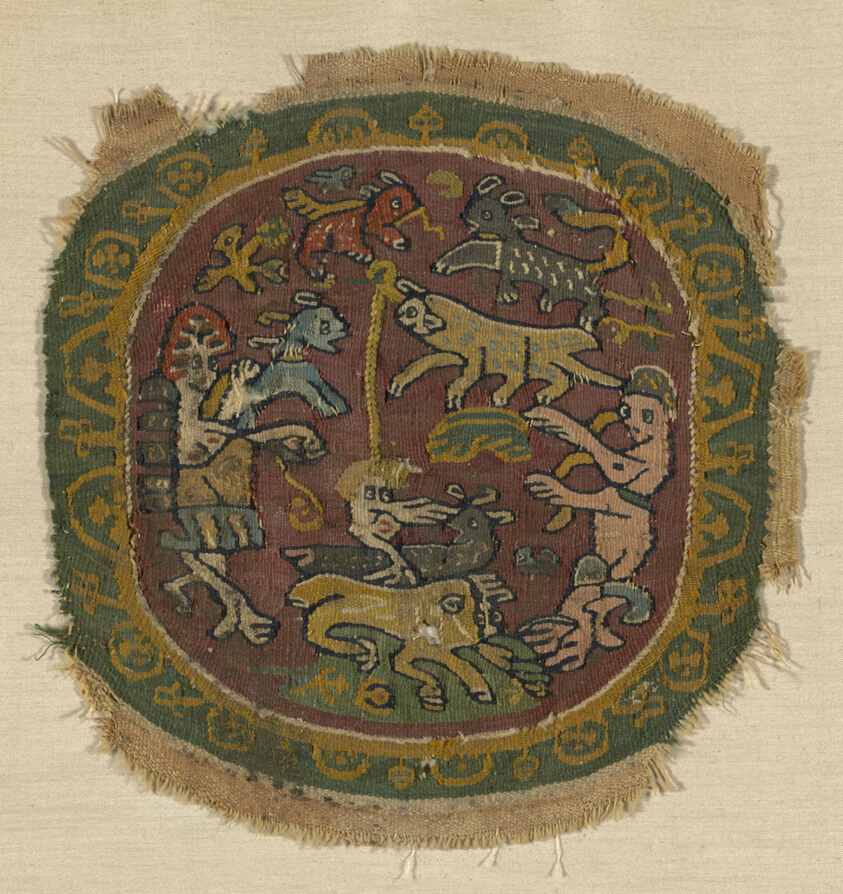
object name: Textile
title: Fragment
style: roman period (egyptian), coptic (period)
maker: Coptic; Egypt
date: Roman period (30 B.C.–641 A.D.)/Arab period (641–969), 6th/8th century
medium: Linen and wool, tapestry weave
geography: Egypt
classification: textile; weaving